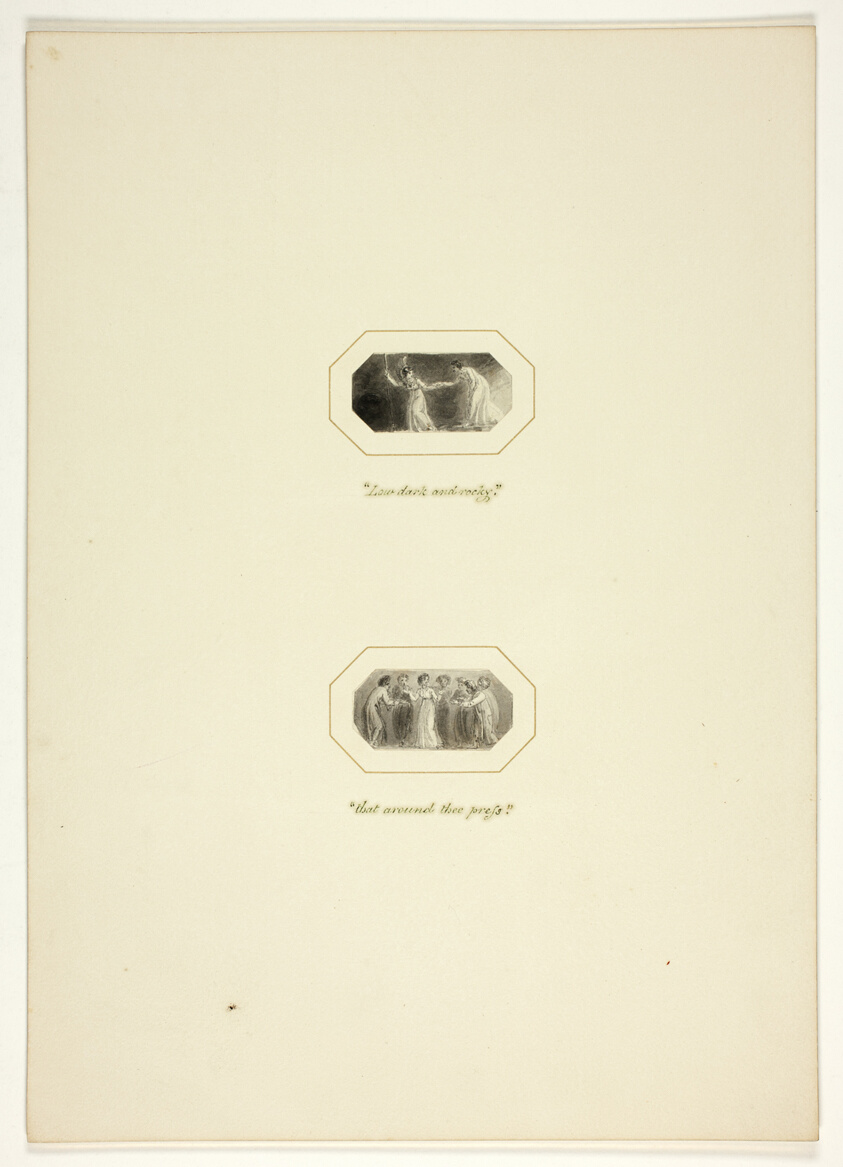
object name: Drawing and Watercolor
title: Study for a plate from The Triumphs of Temper, in the 1796 Royal Engagements Pocket Book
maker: Thomas Stothard (English, 1755-1834)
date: c. 1795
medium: Ink wash on paper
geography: England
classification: ink or chalk wash; drawings (visual works); prints and drawing